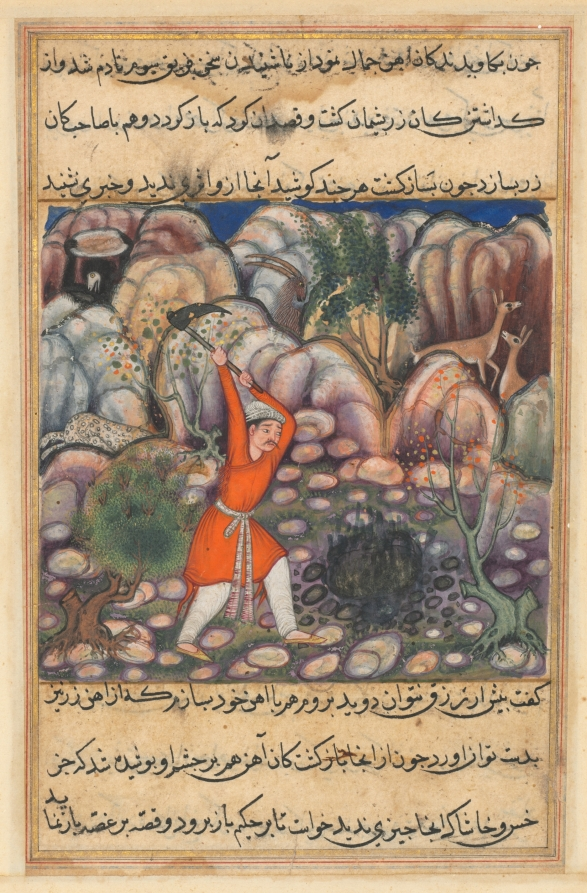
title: The fourth man digs at the spot where he dropped the shell, expecting jewels, but discovering mere iron, from a Tuti-nama (Tales of a Parrot): Forty-seventh Night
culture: Mughal India, court of Akbar (reigned 1556–1605)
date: c. 1560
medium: gum tempera, ink, and gold on paper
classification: Painting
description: Against a rocky landscape, a lone man raises a pickaxe. Previously, he and his four friends had received shells from a wise man, who claimed they would lead the men to their fortunes. Three of the friends discovered copper, silver, and gold. The fourth man, however, was dissatisfied with the discovery of iron, and his greed ultimately led to his downfall.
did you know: A bear, hiding among the rocks on the left, prepares to drop a stone on a spotted creature below him.